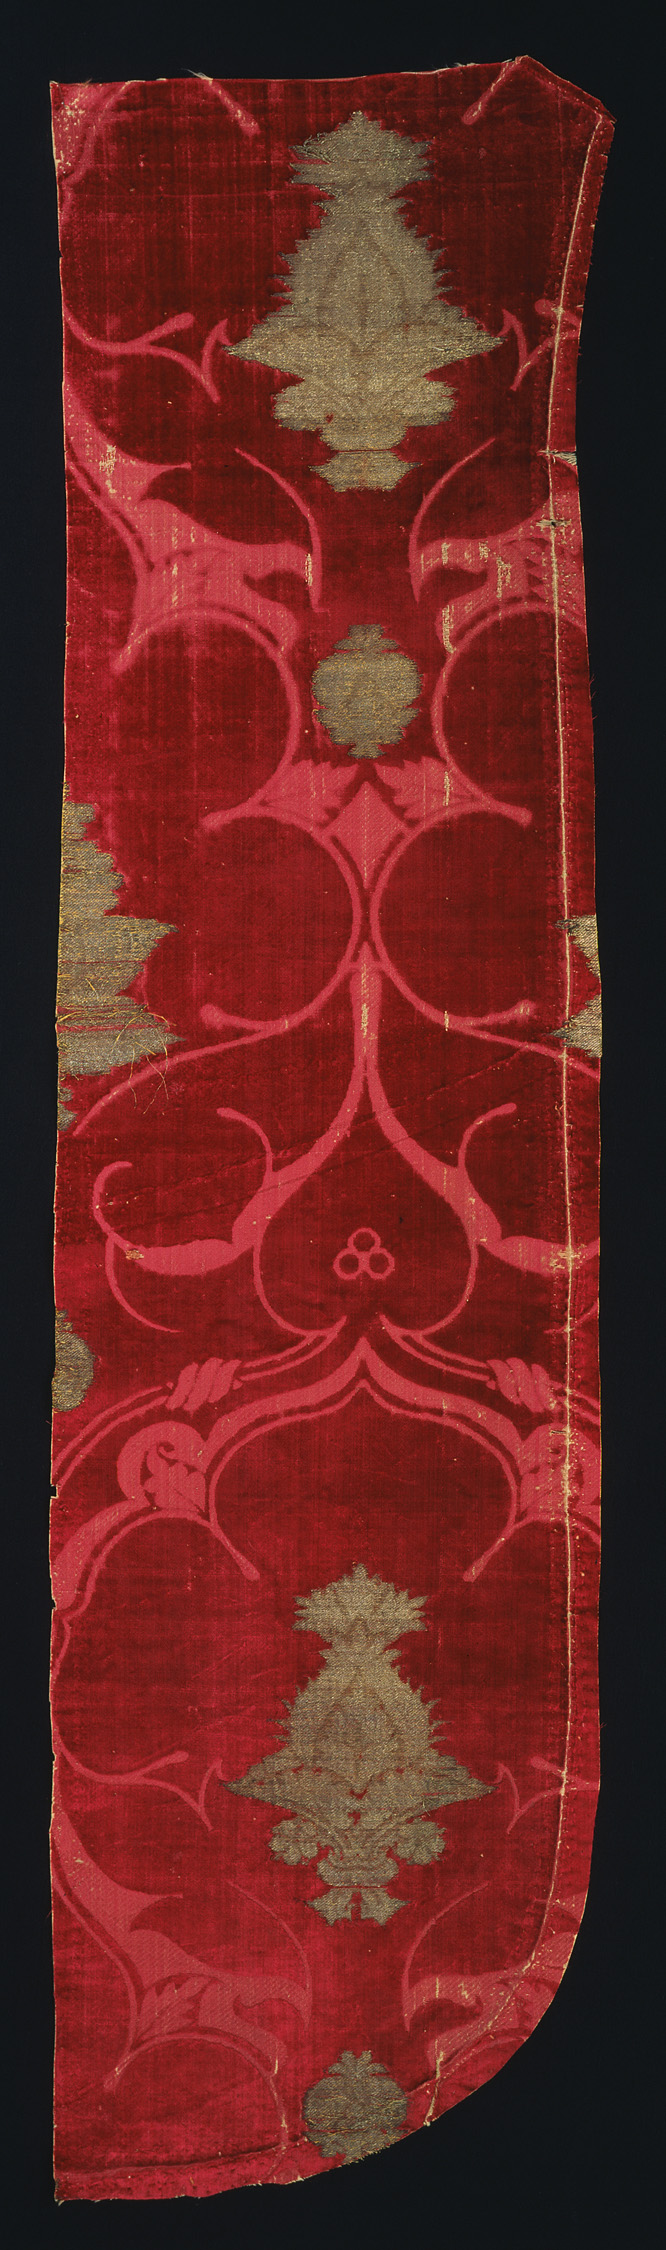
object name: Textile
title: Fragment (From a Chasuble)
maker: Italy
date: 1475/1500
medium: Silk and gilt-metal-strip-wrapped silk, satin weave with supplementary brocading wefts bound by main warps in a twill interlacing and supplementary pile warps forming cut, voided velvet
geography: Italy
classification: textile; weaving - velvet